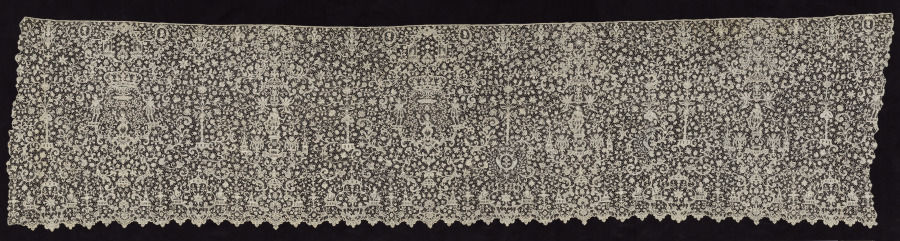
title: Lace Flounce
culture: France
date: 1700–1715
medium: Needle lace (Point de France)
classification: Lace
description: Other pieces of this lace (or ones very similar) are in the Rijksmuseum, Amsterdam; the Isabella Stewart Gardner Museum, Boston; and the Baltimore Museum of Art.